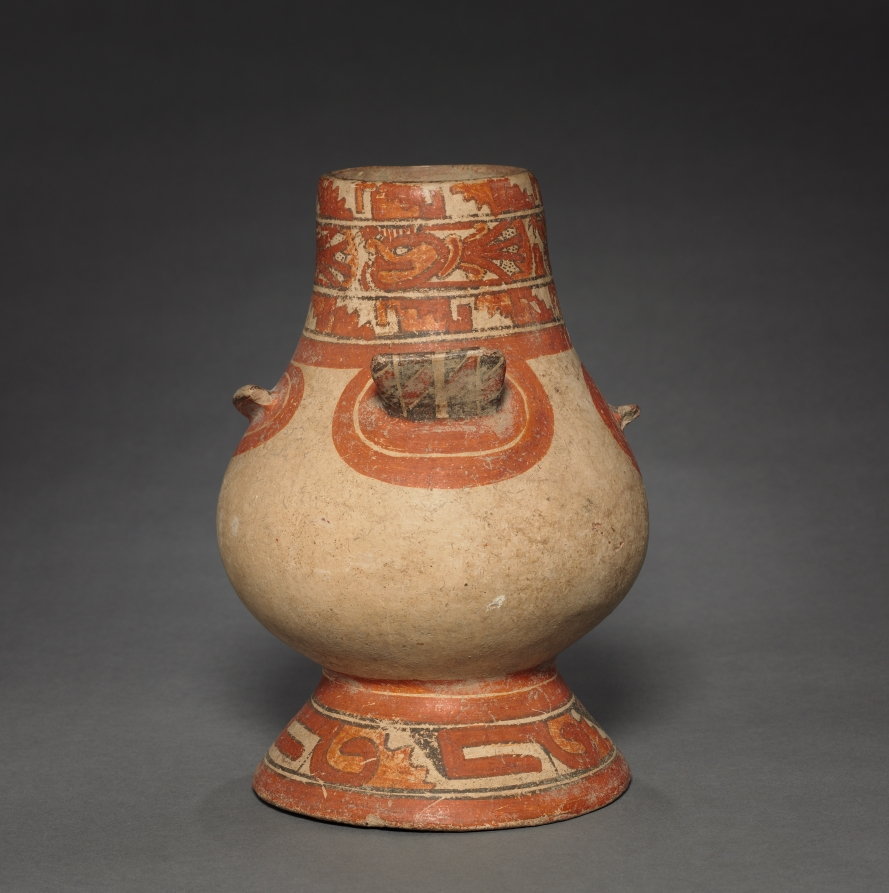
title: Turkey Vessel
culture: Costa Rica, Southern Nicoya region, Pataky Polychrome style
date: c. 1000–1550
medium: ceramic, slip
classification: Ceramic